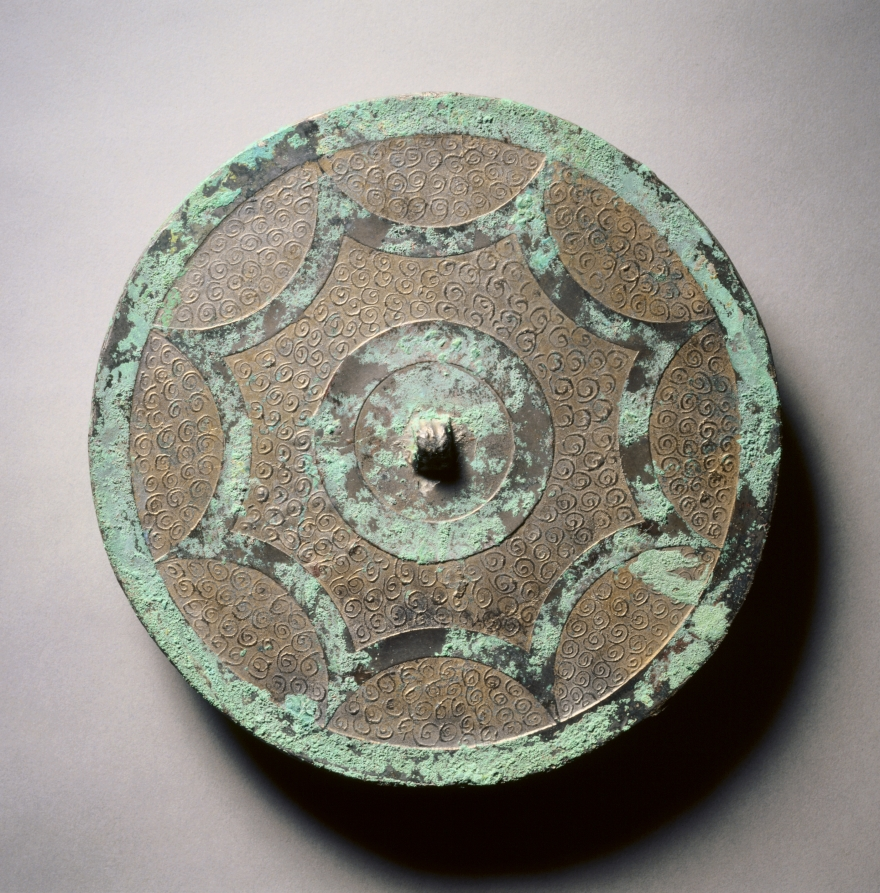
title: Mirror with Continuous Arcs against Whorl Pattern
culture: China, Eastern Zhou dynasty (770–256 BCE), Warring States period (475–221 BCE)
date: 200s BCE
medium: bronze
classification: Metalwork